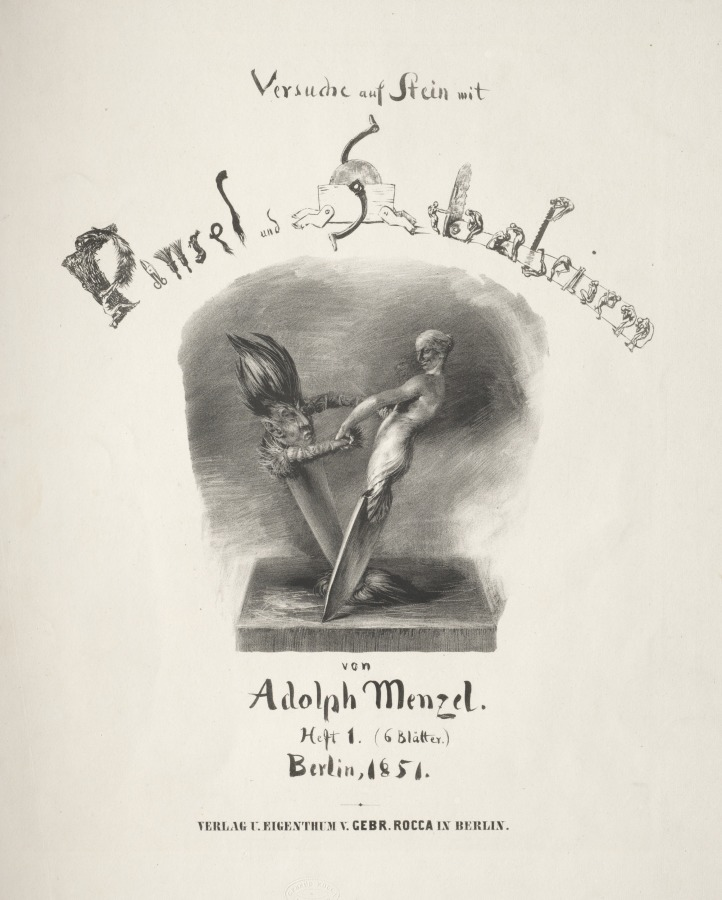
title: Essay on Stone with Brush and Scraper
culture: Germany, 19th century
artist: Adolph von Menzel (German, 1815–1905)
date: 1851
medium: lithograph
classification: Print